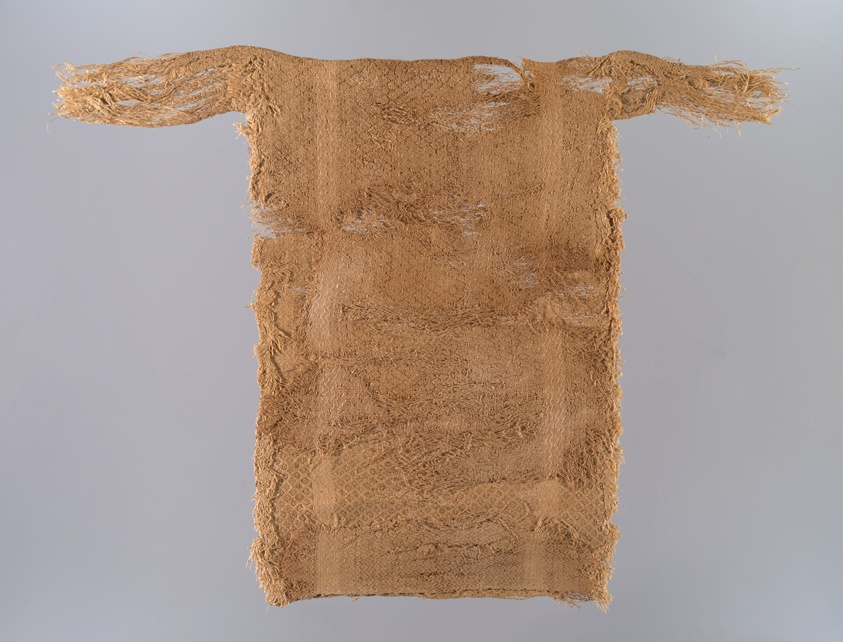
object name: Costume and Accessories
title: Child's Tunic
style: roman period (egyptian)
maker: Coptic (Egypt)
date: Roman period (30 B.C.– 641 A.D.)/Arab period (641–969), 7th century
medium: Linen, compound twill weave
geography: Egypt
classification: textile; weaving; costume; dress (garment); clothing